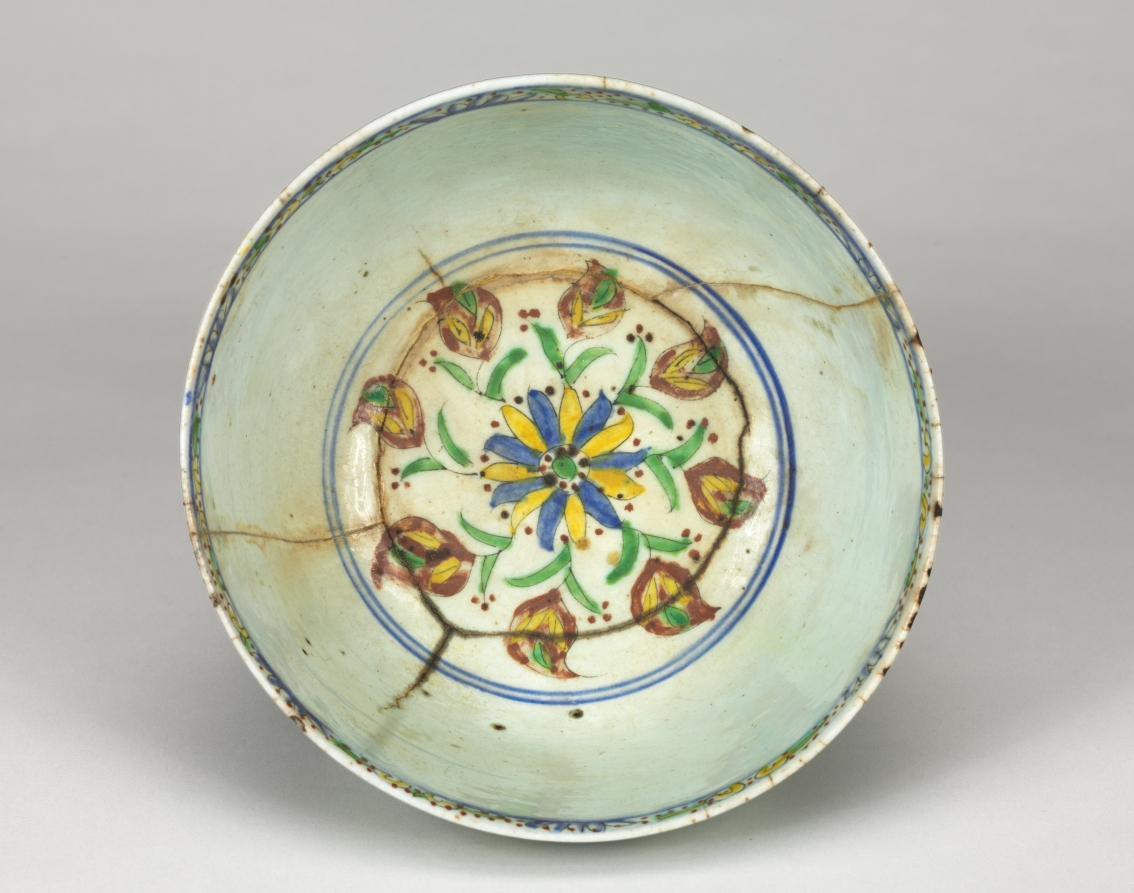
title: Deep Bowl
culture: Turkey (Kutahya), Ottoman Period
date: 1700s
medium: fritware with underglaze-painted design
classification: Ceramic